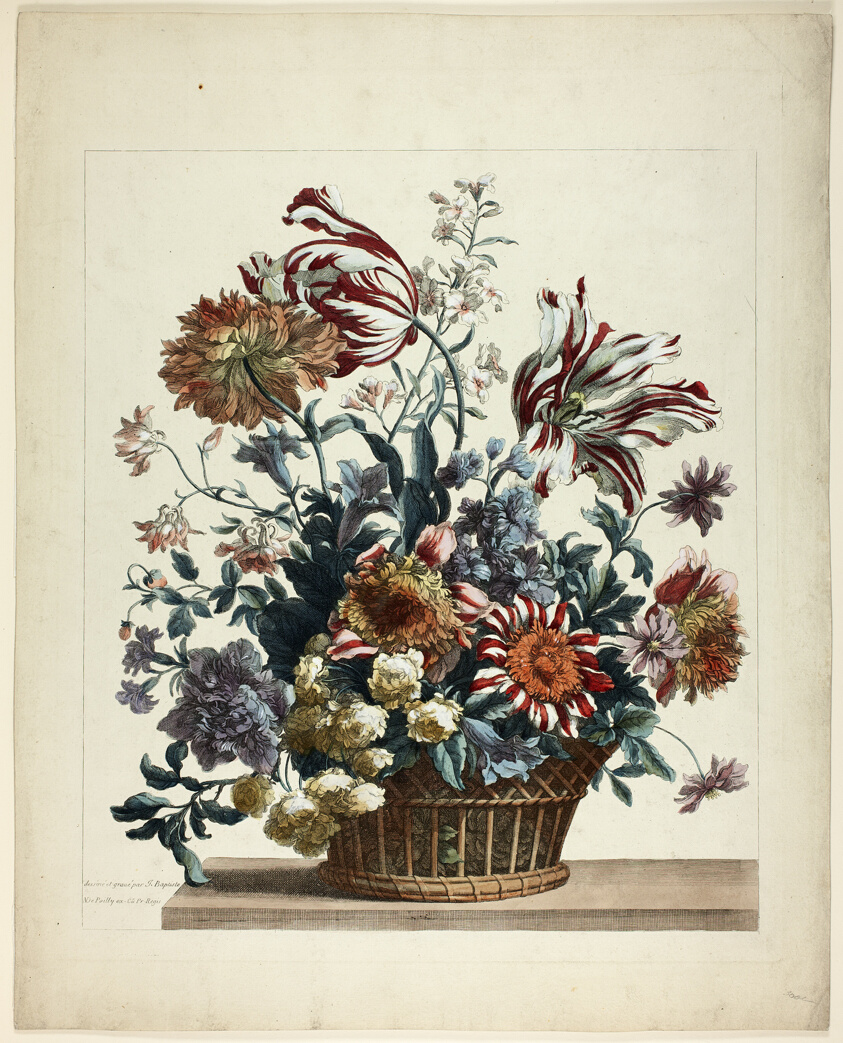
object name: Print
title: Basket of Flowers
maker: Jean Baptiste Monnoyer (French, 1636-1699)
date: c. 1660-90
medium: Etching with hand-coloring on paper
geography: France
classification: etching; print; prints and drawing